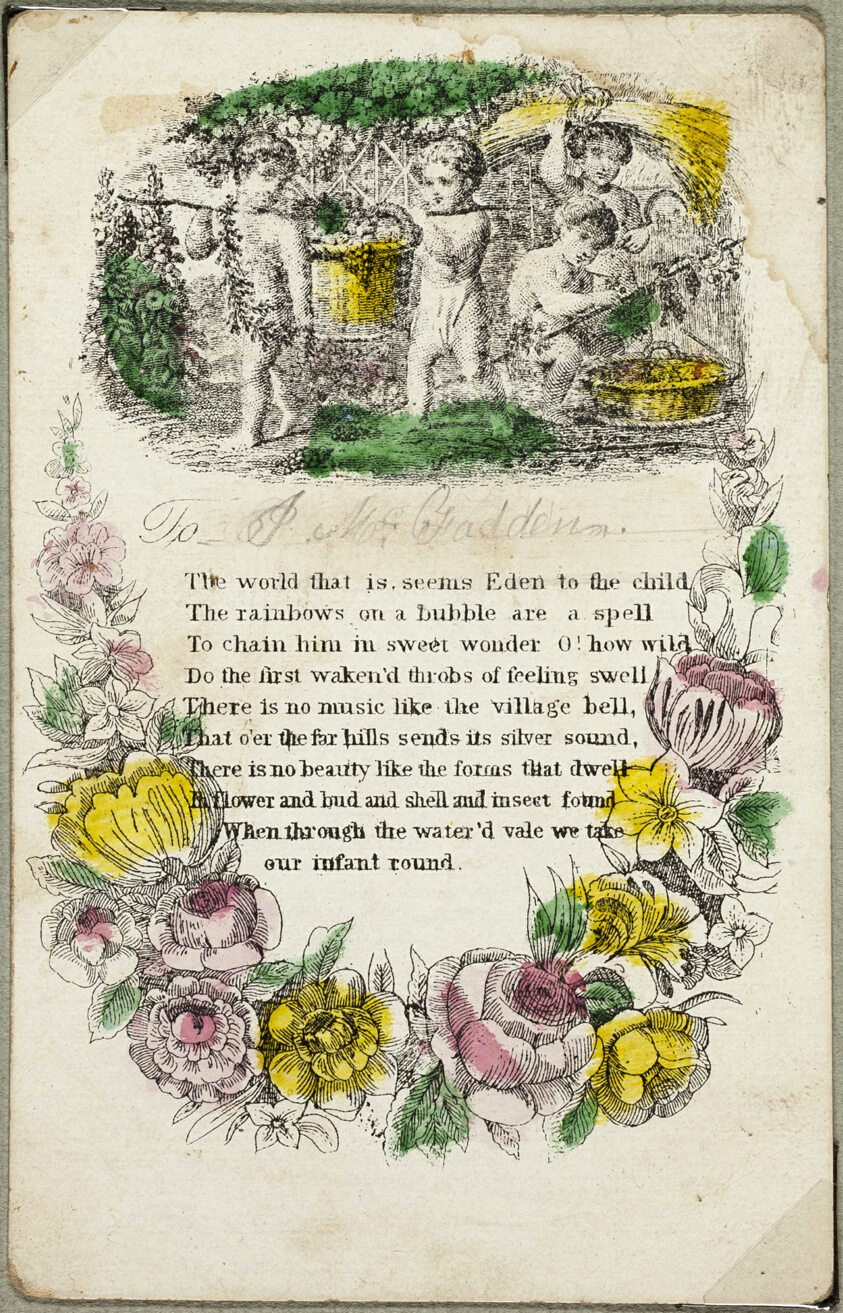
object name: Print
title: The World That Is (valentine)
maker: Unknown Artist; American or English, 19th century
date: c. 1830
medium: Engraving with hand-coloring and traces of graphite on ivory card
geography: United States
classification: valentine; prints and drawing; print